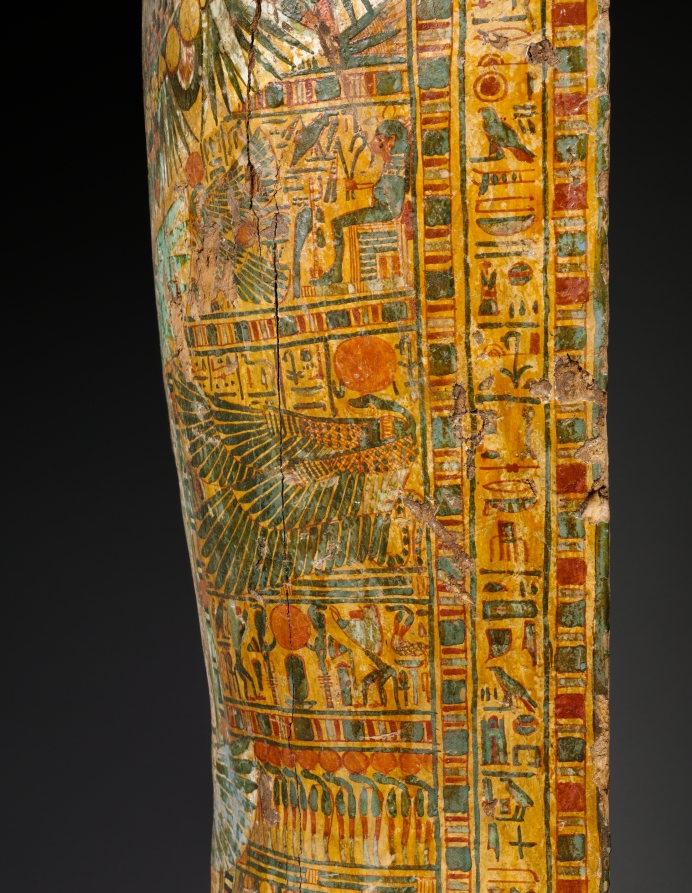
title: Coffin of Nesykhonsu (lid)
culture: Egypt, Third Intermediate (1069–715 BCE), Dynasties 21–22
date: c. 976–889 BCE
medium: gessoed and painted sycamore fig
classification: Funerary Equipment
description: A complete set of coffins during the late New Kingdom and Third Intermediate Period consisted of an outer and inner coffin and a mummy board (essentially a lid without a case, placed directly over the wrapped mummy). Judging by its size, this must have been Nesykhonsu's outer coffin. The type is essentially the same as the coffin of Bakenmut, which was also an outer coffin. The two coffins are said to have been found together and to have belonged to a man and wife. This is quite possible, although the inscriptions do not bear it out. Bakenmut is not mentioned on Nesykhonsu's coffin, nor is she mentioned on his. There was by this time a tremendous repertoire of scenes appropriate for coffin decoration. Whereas Bakenmut's coffin features images of deified dead pharaohs, Nesykhonsu's is decorated in a more personal way with scenes from her own funeral. The main scene in the interior (near the top) shows a priest clad in a panther skin with the mummy of Nesykhonsu behind. The god appears in mummy form and wears a sun disk on his head. The scarab beetle inside the sun disk identifies him as Khepri, the morning sun, and the hieroglyphs to the right identify him as Atum, the evening sun. Taken together, image and text represent the sun god in both his rising and setting, youthful and aged aspects.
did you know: Two of Nesykhonsu's titles, "Lady of the House" and "Singer of the Choir of Mut the Great," are written on the outside of the coffin.